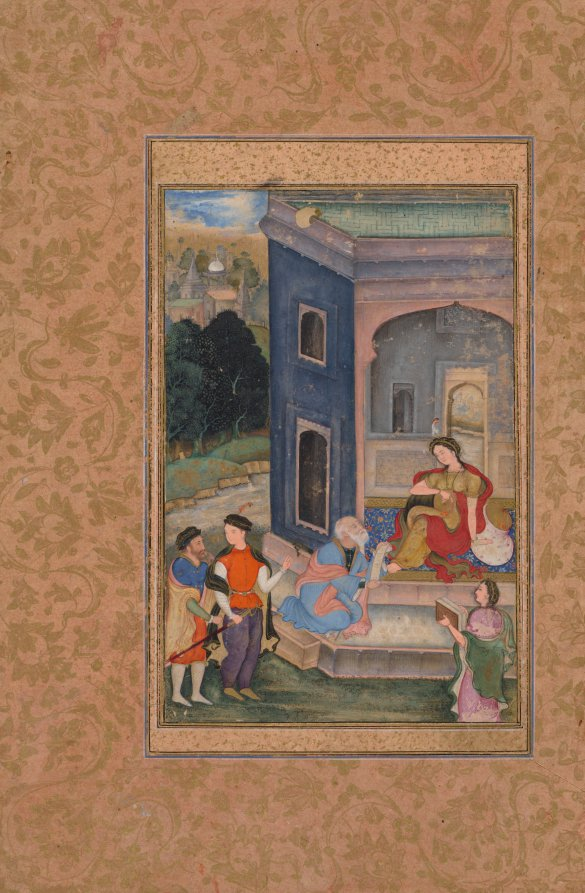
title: European Costume Scene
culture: India, Mughal Dynasty (1526-1756)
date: c. 1590–1595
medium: Gum tempera and gold on paper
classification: Painting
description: This painting of European subjects by an unnamed Indian artist depicts an unidentified scene in which two merchants approach a pavilion where a seated lady receives a kneeling holy man unrolling a scroll before her. The figures wear garments associated with different periods, which increases the painting’s ambiguity. The distant cityscape in the upper left corner is a Mughal version of the type introduced into India by Jesuit missionaries who brought gifts of European paintings and engravings.